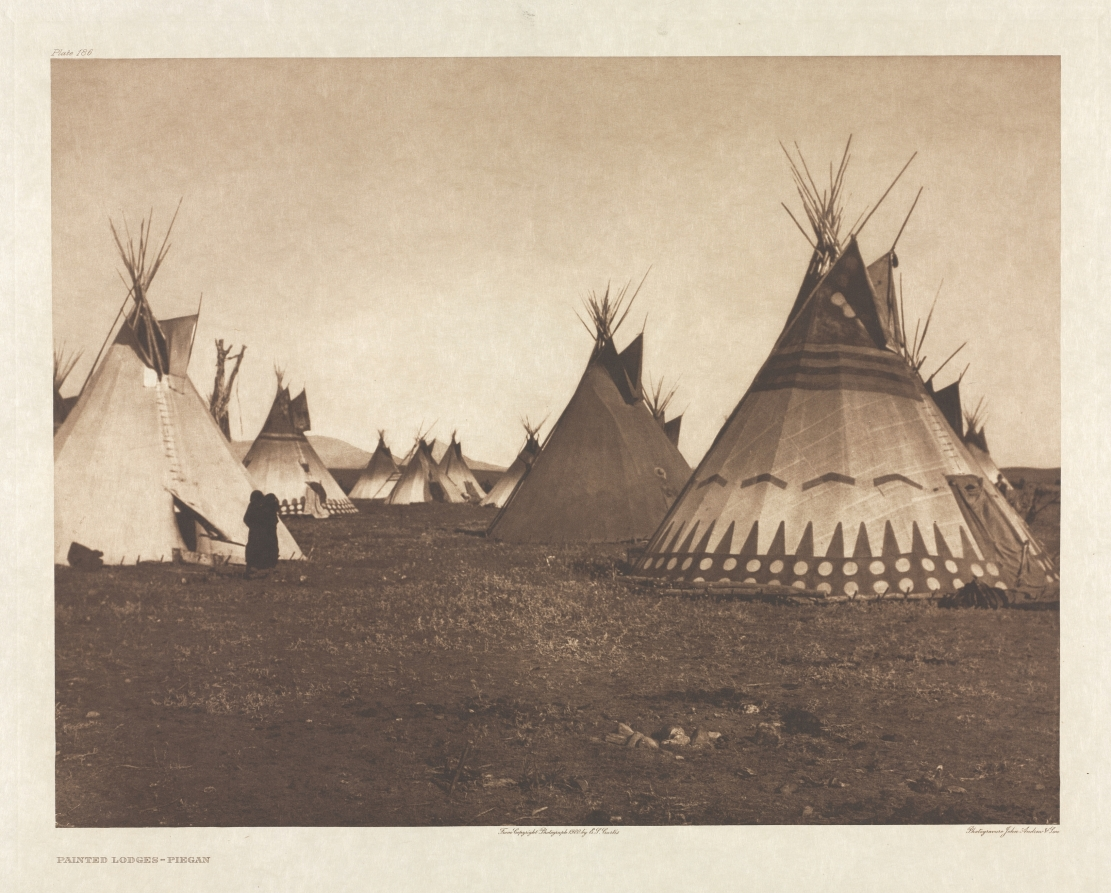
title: Portfolio VI, Plate 186: Painted Lodges--Piegan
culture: America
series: The North American Indian: being a series of Portfolios picturing and describing the Indians of the United States, the Dominion of Canada, and Alaska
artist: Edward S. Curtis (American, 1868–1952)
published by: The University Press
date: 1900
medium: photogravure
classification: Portfolio